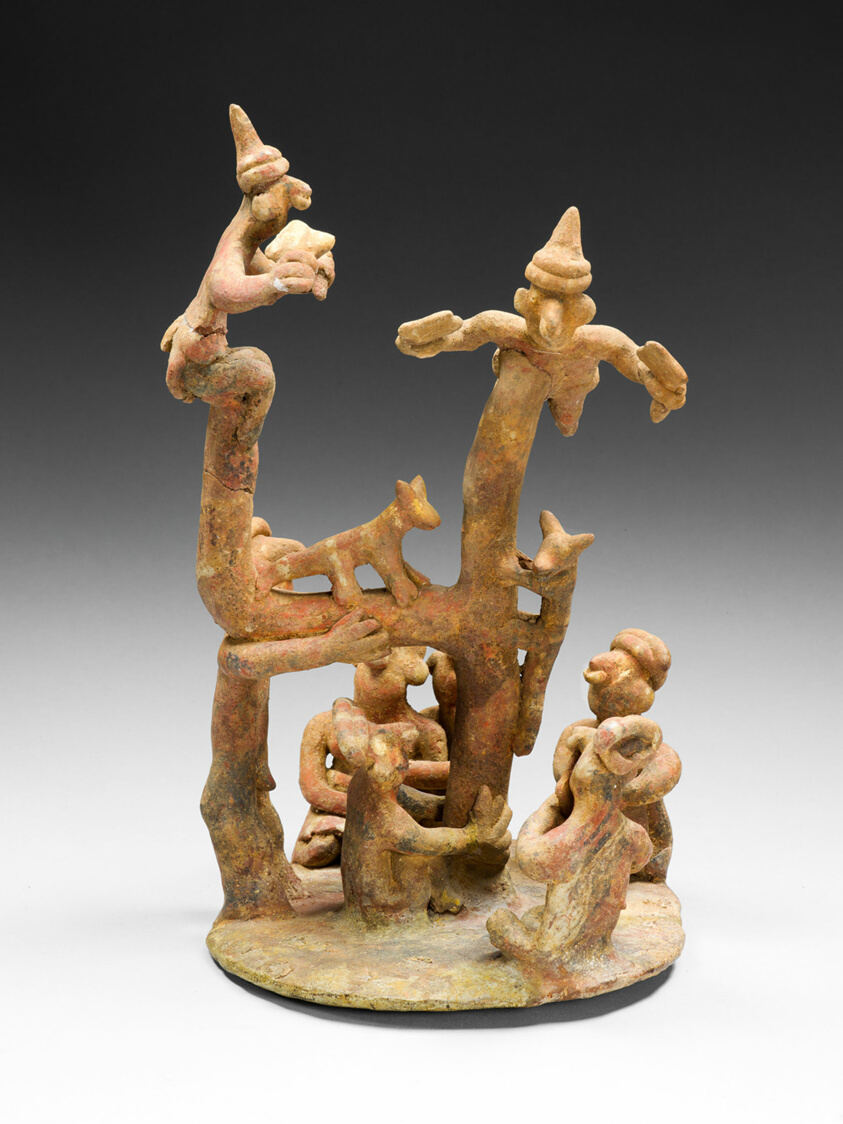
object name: Model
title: Model of a Tree-Climbing Ritual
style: nayarit, mesoamerican, Pre-Columbian, americas, west mexico, ixtalan del rio, Arts of the Americas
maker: Nayarit (Ixtlán del Río, Nayarit, Mexico)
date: 100–800 CE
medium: Ceramic and pigment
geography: Nayarit state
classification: ceramics; earthenware; art of the americas; sculpture; model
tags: people, celebrations, ritual, acrobats, performance